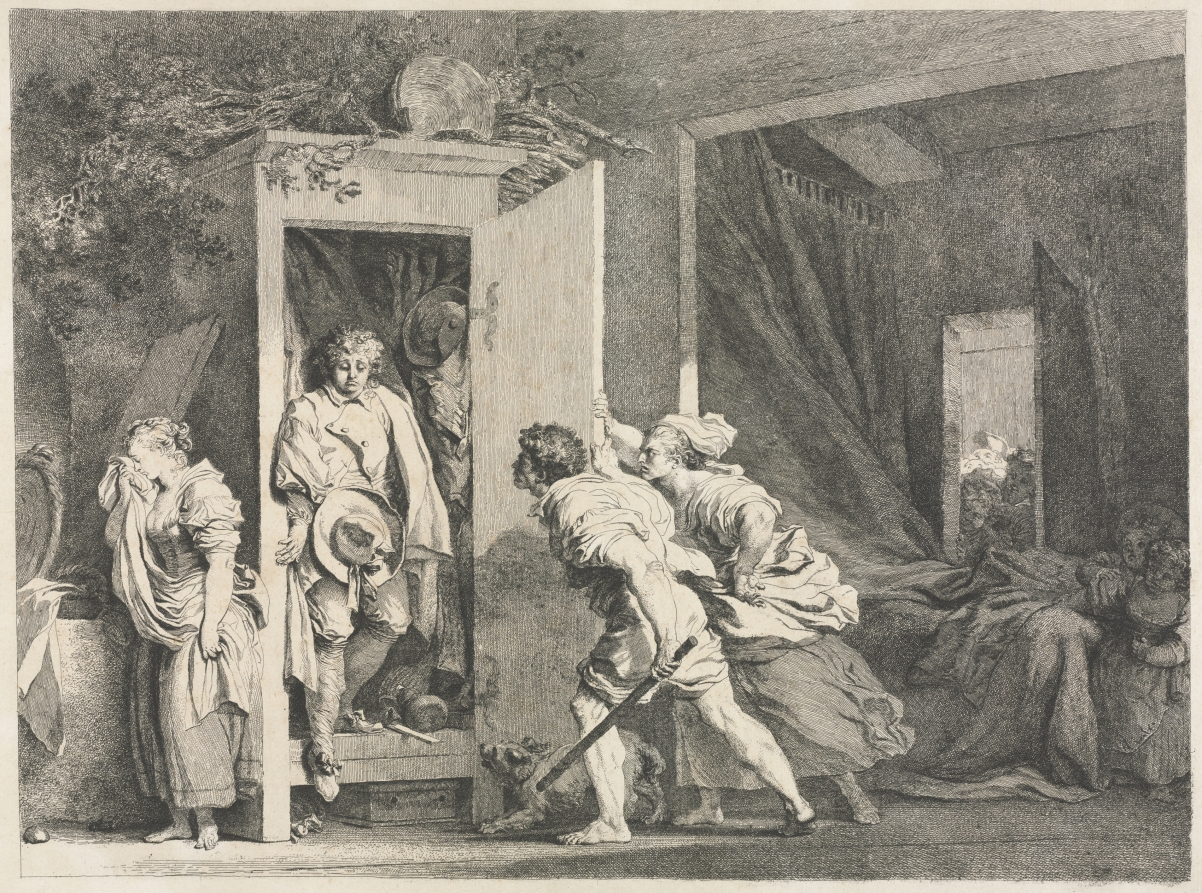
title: The Cupboard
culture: France, 18th century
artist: Jean-Honoré Fragonard (French, 1732–1806)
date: 1778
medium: etching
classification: Print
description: Fragonard designed this popular etching to delight his viewers, who spy on the dramatic scene like the eavesdropping servants in the background. A maiden weeps as her boyfriend, caught hiding in a wardrobe, sheepishly faces the girl’s angry parents. Rumpled bed sheets and the position of the hat give away the passionate activities of the young lovers. Comically, the hat with a broad ribbon held by the boy belongs to his girlfriend. His plain hat with a buttoned-up brim hangs in the cupboard.